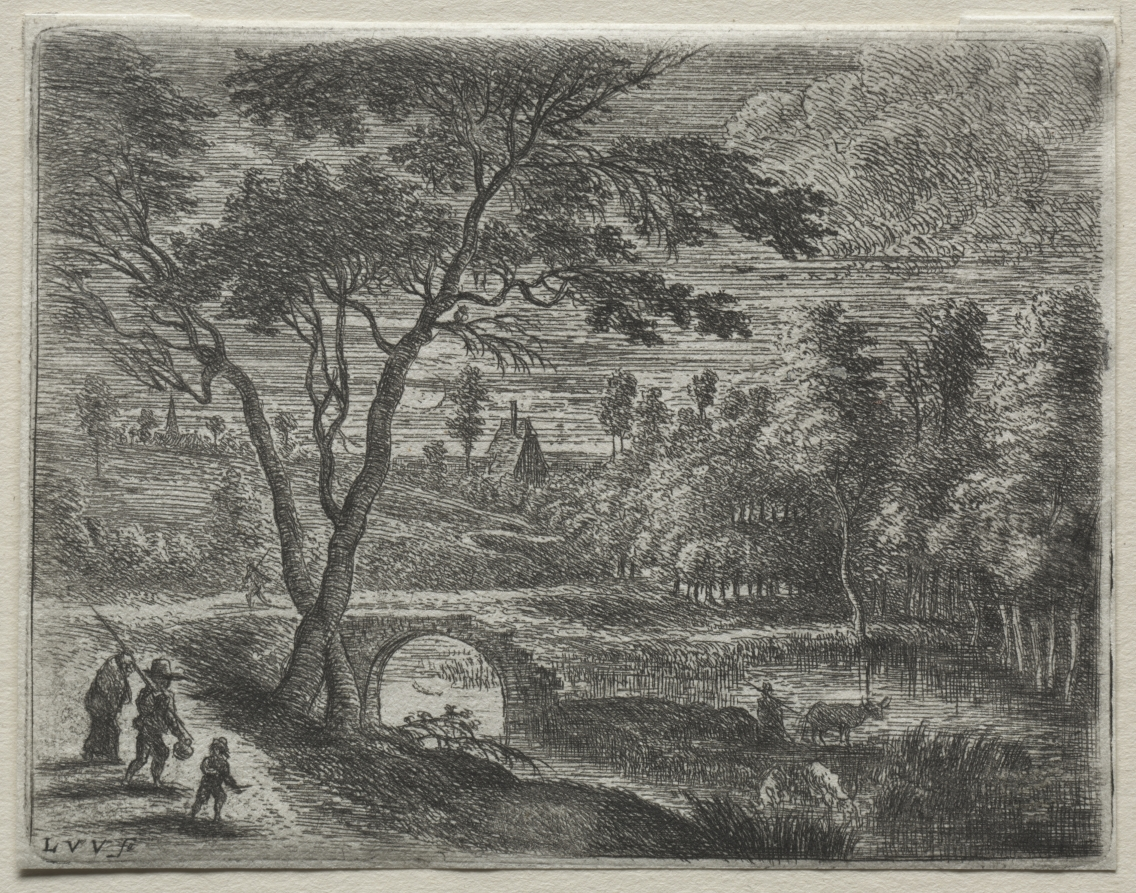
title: The Broken Bridge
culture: Netherlands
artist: Lucas van Uden (Dutch, 1595–1672/73)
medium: etching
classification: Print